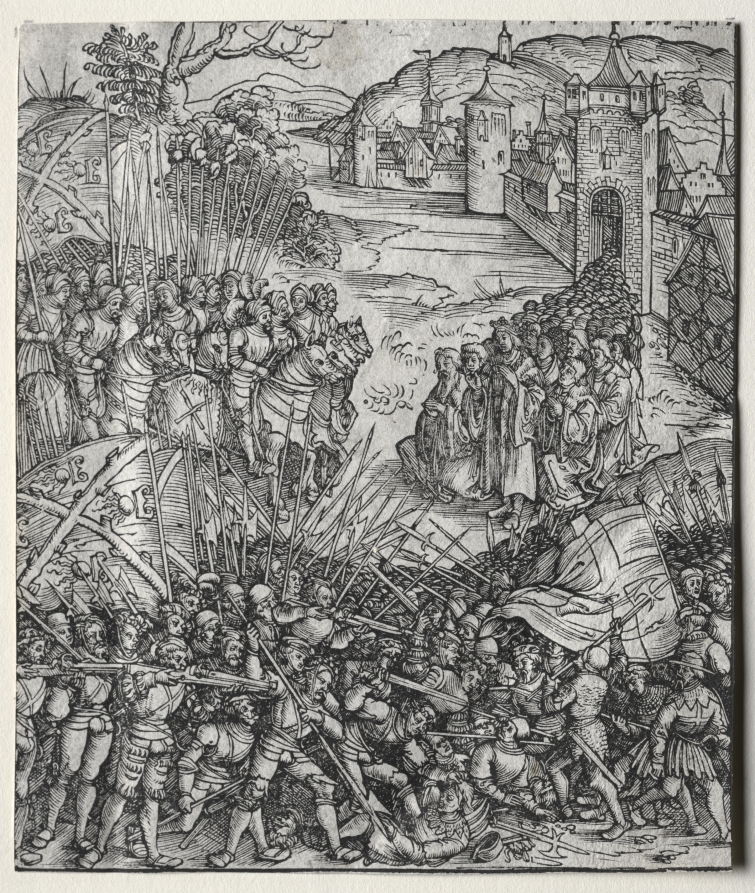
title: First Flemish Rebellion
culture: Germany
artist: Wolf Traut (German, c. 1486–1520)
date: 1512–1515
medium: woodcut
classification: Print